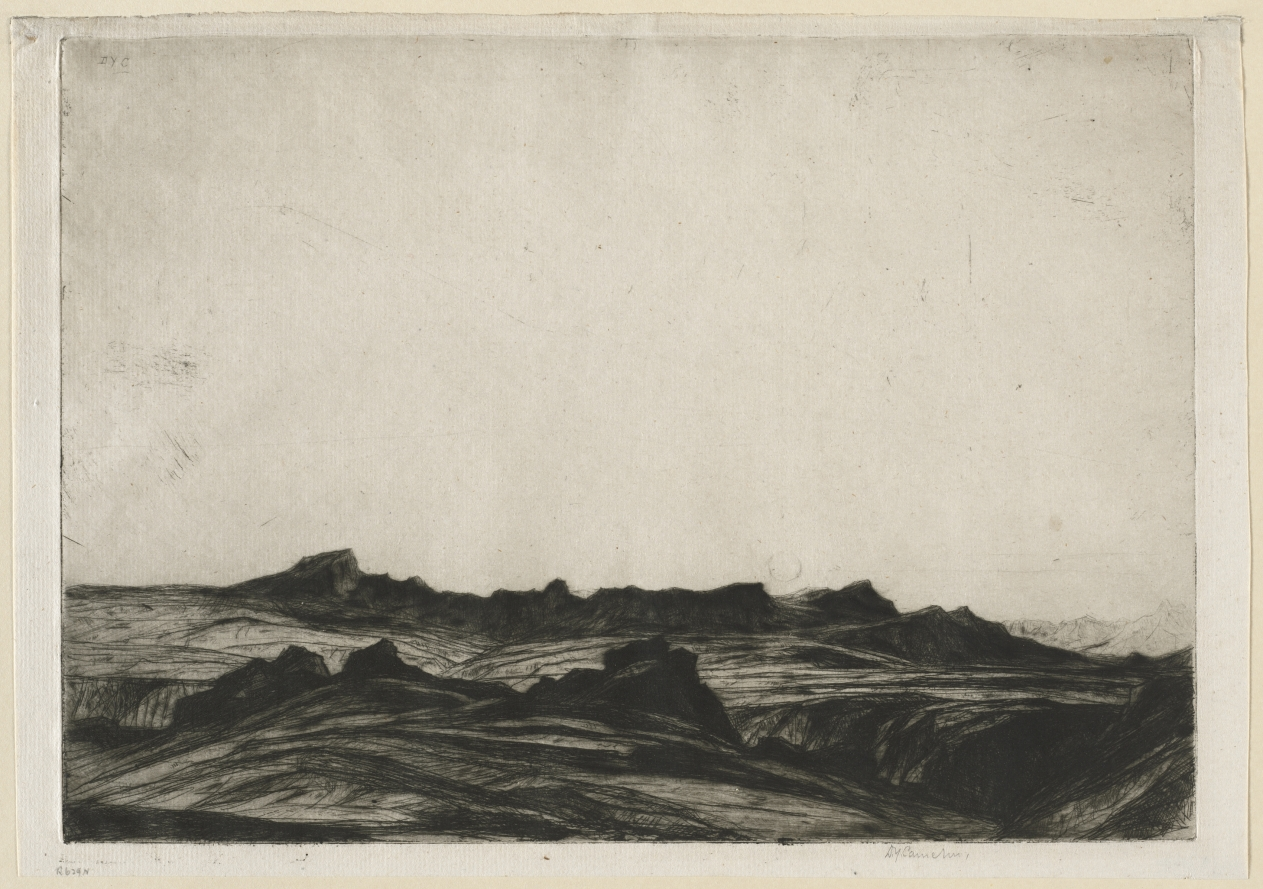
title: Arran Peaks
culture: England, 20th century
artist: David Young Cameron (British, 1865–1945)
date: 1912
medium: etching and drypoint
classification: Print